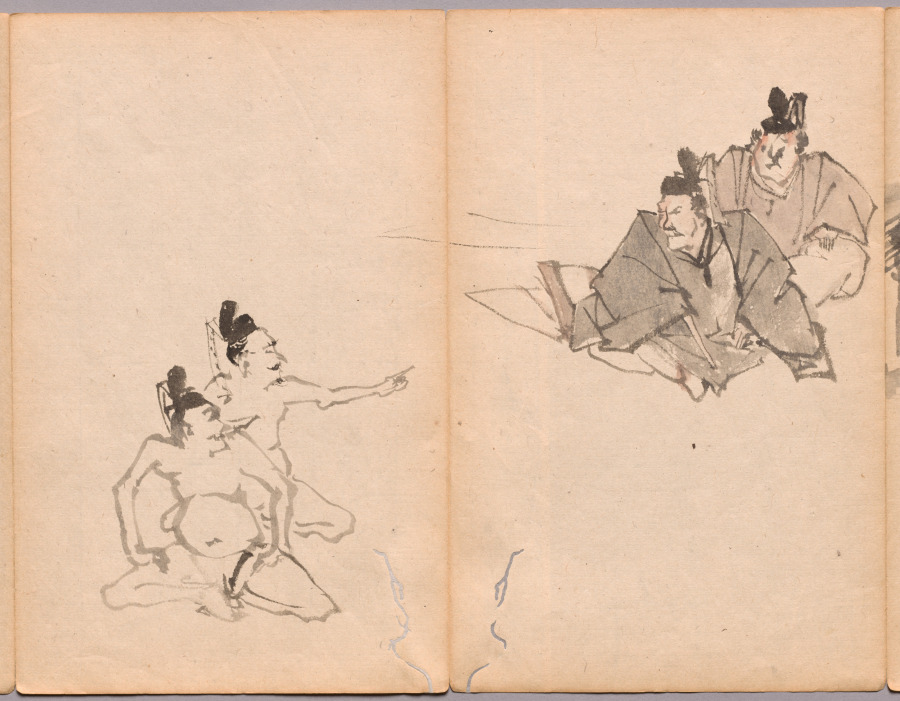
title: Courtiers from Sketch Album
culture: Japan, Edo period (1615–1868) to Meiji period (1868–1912)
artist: Kawanabe Kyōsai (Japanese, 1831–1889)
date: mid- to late 1800s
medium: Accordion-style book of 26 double-leaves; ink and color on paper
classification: Bound Volume